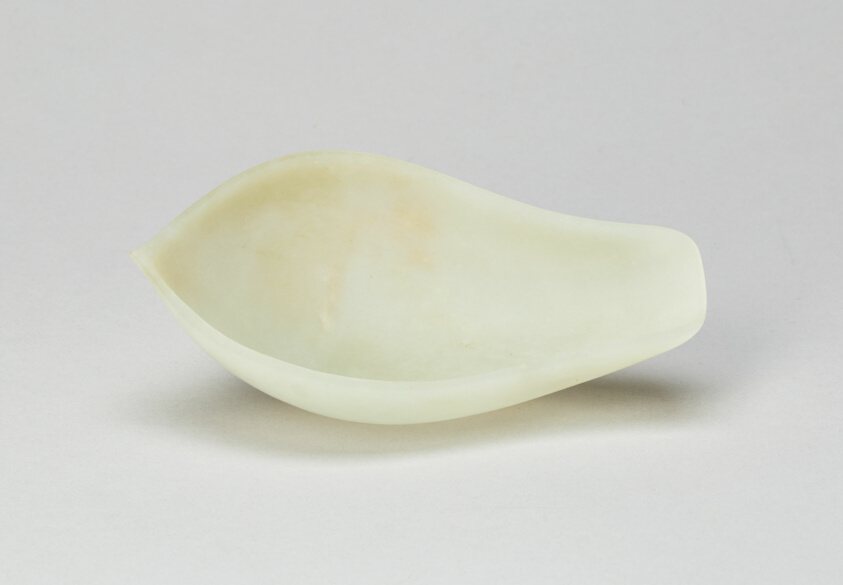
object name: Vessel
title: Spoon inthe Form of a Lotus Leaf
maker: China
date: Ming dynasty (1368–1644), late 16th/early 17th century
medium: Jade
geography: China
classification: jade; asian art